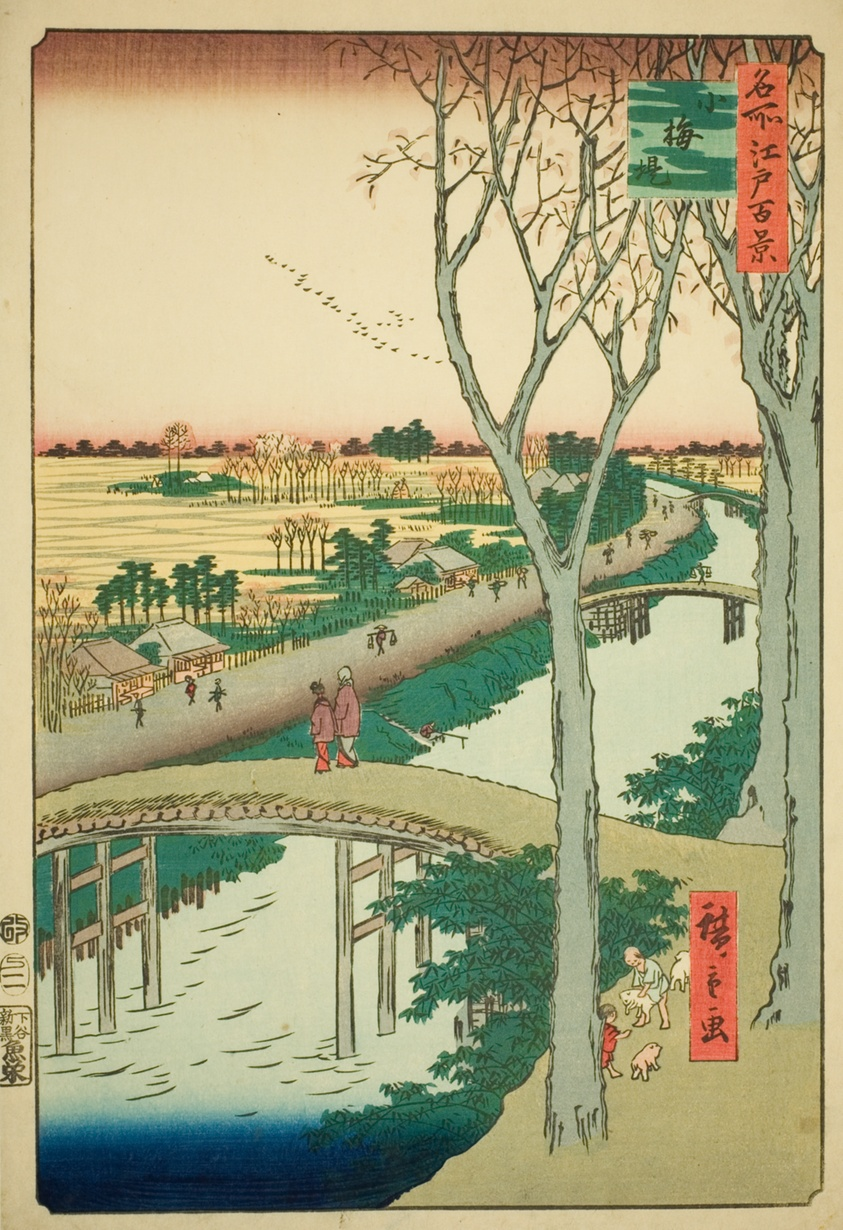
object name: Print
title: Koume Embankment (Koumezutsumi), from the series "One Hundred Famous Views of Edo (Meisho Edo hyakkei)"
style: Japanese (culture or style)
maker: Utagawa Hiroshige 歌川 広重; Japanese, 1797-1858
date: 1857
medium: Color woodblock print; oban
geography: Japan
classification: woodblock print; print; asian art